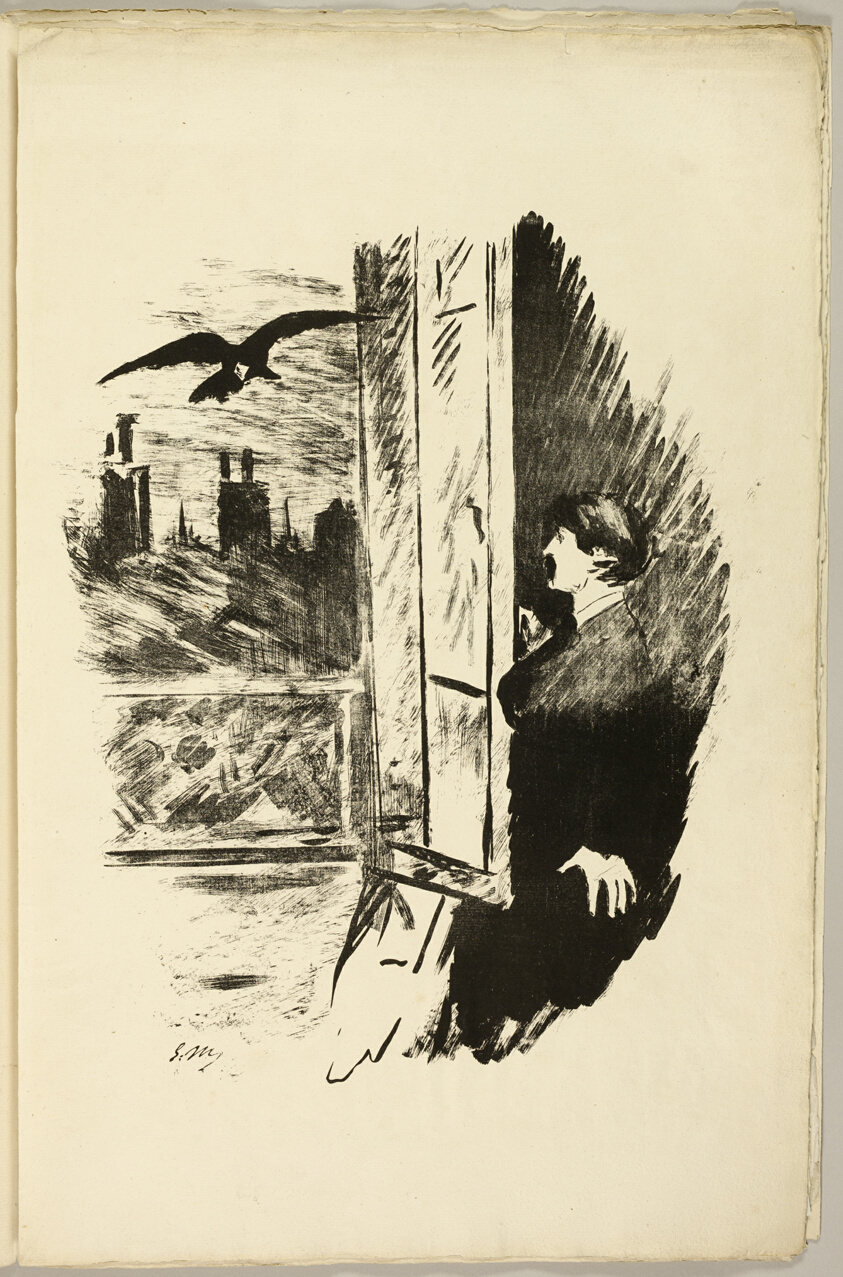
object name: Print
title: At the window ("Open here I flung the shutter..."), from The Raven (Le Corbeau)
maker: Édouard Manet (French, 1832-1883); written by Edgar Allan Poe (American, 1809-1849); translated and produced by Stéphane Mallarmé (French, 1842-1898); printed by Lefman et Cie. (French, 19th century); published by Richard Lesclide (French, 1825-1892)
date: 1875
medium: Transfer lithograph in black on cream laid paper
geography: France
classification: lithograph; paper; print; prints and drawing